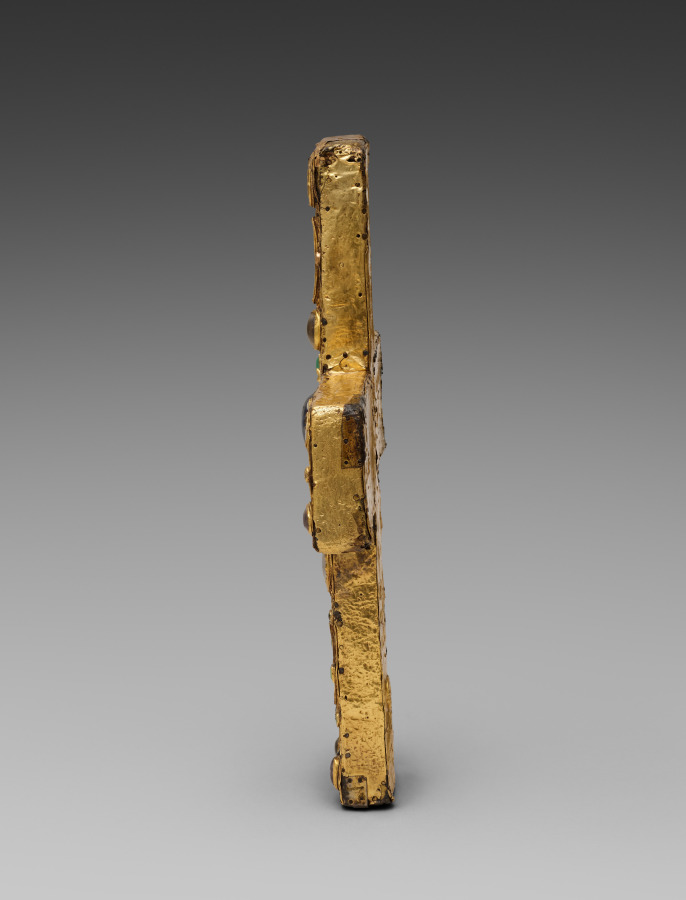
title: Ceremonial Cross of Countess Gertrude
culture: Germany, Lower Saxony?, 11th century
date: 1038 or shortly after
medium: gold: worked in repoussé; cloisonné enamel, intaglio gems, pearls, wood core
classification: Metalwork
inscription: translation of inscription on back: For the Relics of the Holy Apostle Peter and the Holy Virgin Liutrudis, Countess Gertrude Ordered this made.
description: This precious gold cross was commissioned by Countess Gertrude (died 1077) and given to the church of Saint Blaise following the death of her husband, Count Liudolf of Brunswick (died 1038). The cross was intended to be carried in liturgical processions or to be placed on a church altar. The inclusion of relics within the crosses endowed them with an additional role as devotional objects. At the center of the four cross arms, fine but much damaged cloisonné enamel plaques represent the symbols of the four Evangelists--an eagle for Saint John (above); a lion for Saint Mark (on the left); an ox for Saint Luke (on the right); and an angel for Saint Matthew (below). Pearls and precious and semiprecious stones are set within an intricate network of gold filigree while a large sapphire, inscribed in a circle and likewise surrounded by pearls and precious stones, is placed at the crossing.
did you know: Countess Gertrude's name appears on the back of the cross at the bottom.